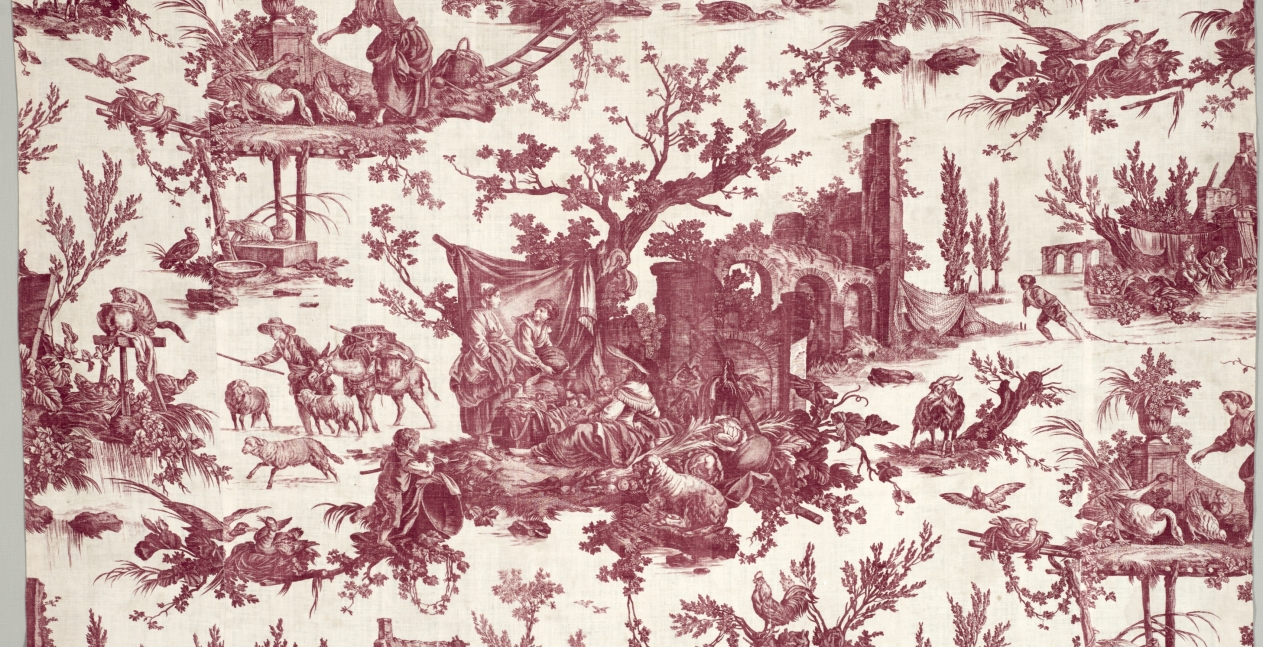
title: Strip of Copperplate Printed Cotton with "Les plaisirs de la ferme" Design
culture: France, 18th century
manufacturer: firm of Christophe Philippe Oberkampf (French, 1738–1815)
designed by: Jean-Baptiste Marie Hüet (French, 1745–1811)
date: 1785–1790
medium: copperplate printed cotton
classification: Textile